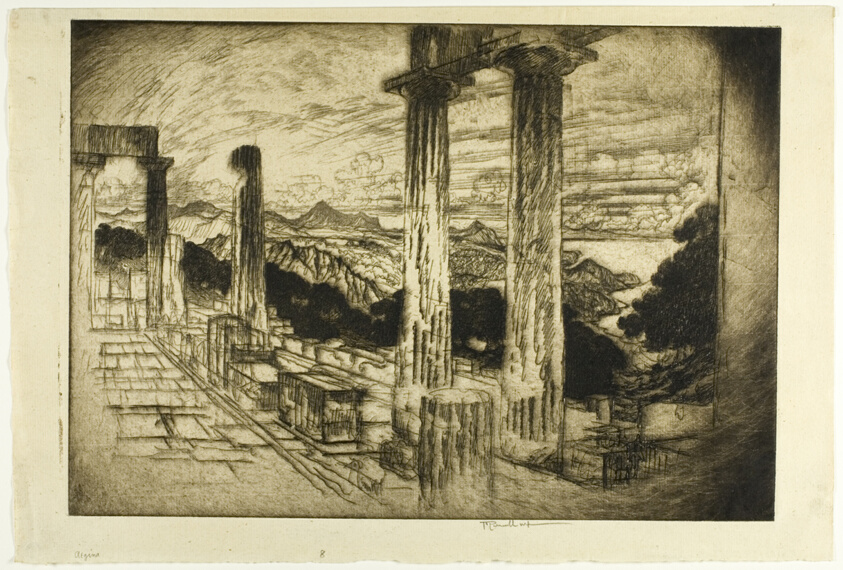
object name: Print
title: Aegina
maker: Joseph Pennell (American, 1857-1926)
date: 1913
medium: Etching on ivory laid paper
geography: United States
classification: etching; print; prints and drawing